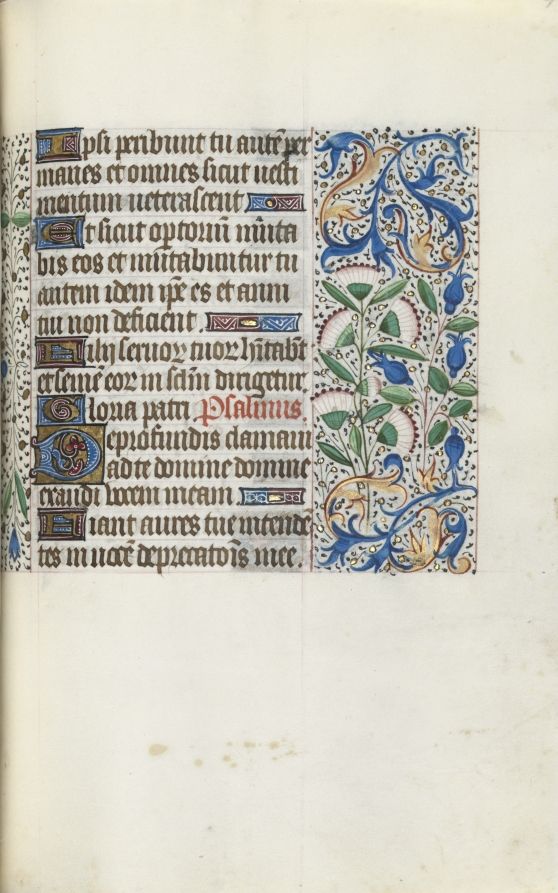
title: Book of Hours (Use of Rouen): fol. 90r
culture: France, Rouen, 15th century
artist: Master of the Geneva Latini (French, active Rouen, 1460–80)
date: c. 1470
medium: ink, tempera, and gold on vellum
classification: Bound Volume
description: In the late 1400s and early 1500s Rouen was an established and important center of book production. The city’s cathedral had a wealthy chapter that spent large sums of money to commission books and to maintain its extensive library. The stationers and booksellers would have likely been concentrated in or near the cathedral precinct. This artist, named after a manuscript now in Geneva, was Rouen’s principal illuminator during the second half of the 1400s.